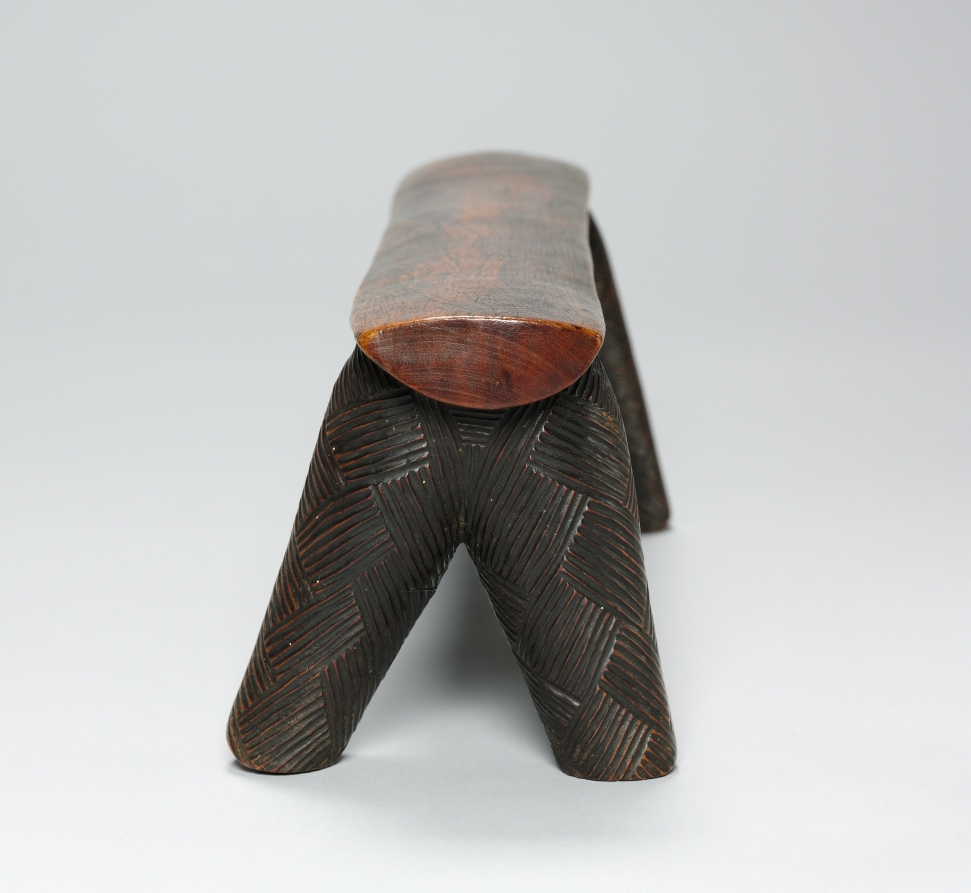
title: Headrest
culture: Africa, Southern Africa, South Africa, Zulu-style carver; Africa, Southern Africa, South Africa, Kingdom of Eswatini, Swazi-style carver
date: 1800s–1900s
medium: Wood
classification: Furniture and woodwork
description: The shape of this four-legged headrest alludes to cattle, whether bull, ox, or cow. This reference services from the fact that these animals are a source of wealth but also act as mediators between the living and the dead. In earlier days, both headrests and cattle were used in dowry transactions.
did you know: Headrests served to protect the elaborate coiffures highly fashionable until the early to mid-20th century and also enhanced contact with the ancestral realm through dreams.